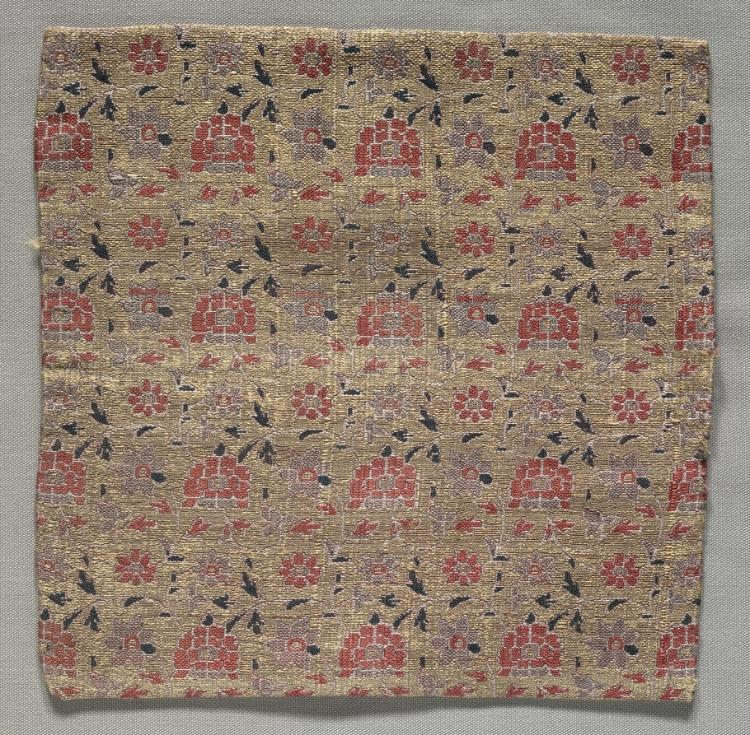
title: Fragments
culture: Iran, 18th century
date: 1700s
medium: silk, brocaded, with metal thread weft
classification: Textile